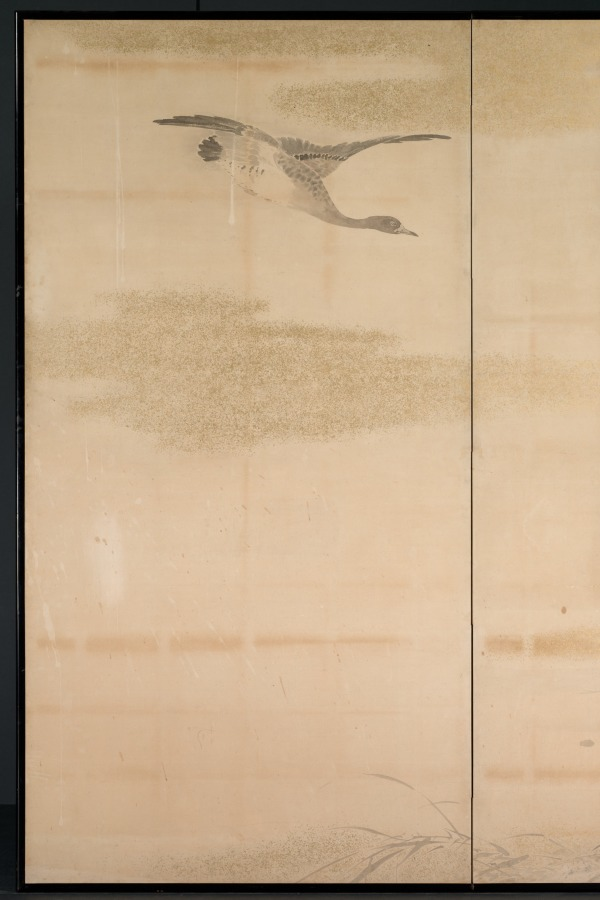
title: Geese, Reeds, and Water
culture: Japan, Edo period (1615–1868)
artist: Yamamoto Baiitsu (Japanese, 1783–1856)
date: 1800s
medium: One of a pair of four-panel folding screens; ink, color, and cut gold foil on paper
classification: Painting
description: This byōbu composition differs from most in that it comprises two four-panel screens, rather than two six-panel units. Since the current mounting is modern, it is impossible to determine whether its present configuration represents its original design. Some panels may have been removed to help the screens better fit into a modern interior space. Baiitsu worked almost exclusively in monochromatic ink tones and favored classical Chinese painting themes.